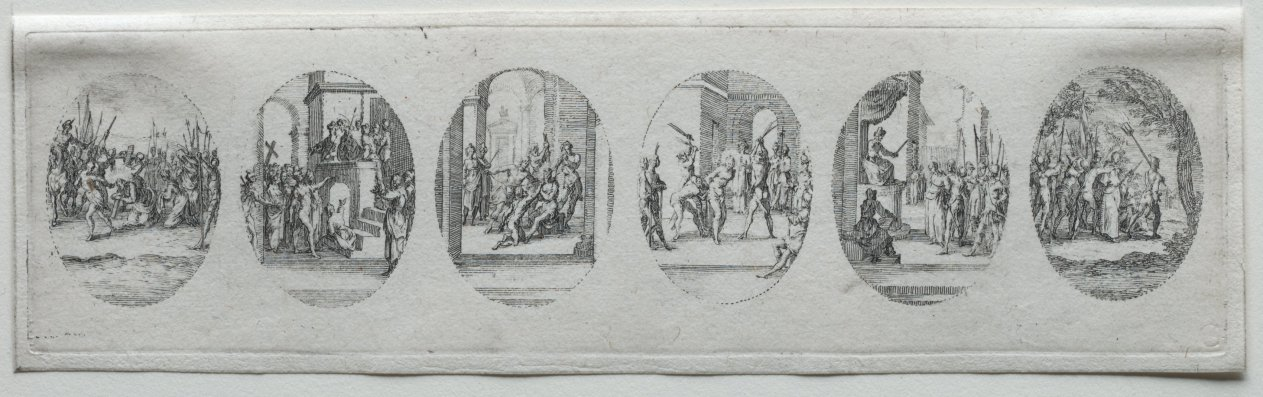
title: The Mysteries of the Passion: Christ Taken Captive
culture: France, 17th century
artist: Jacques Callot (French, 1592–1635)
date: 1631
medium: etching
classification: Print